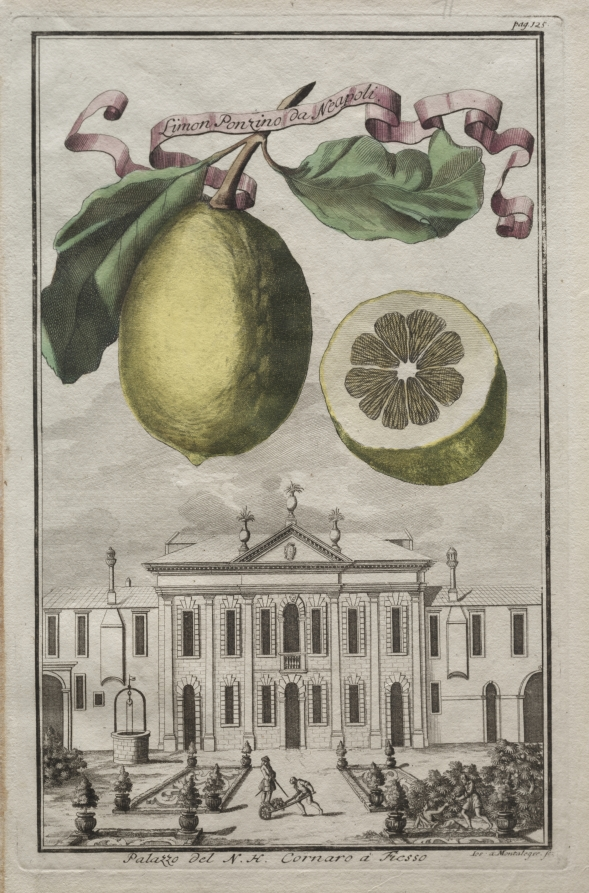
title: Nurnbergische Hesperides: No. 125 - Limon Ponzino da Neapoli. Palazzo del N. H. Cornaro à Fiesso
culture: Hungary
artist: Joseph de Montalegre (Hungarian)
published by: Johoann Christoph Volckamer (German)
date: c. 1708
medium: engraving, hand-colored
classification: Print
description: The title of this set refers to Hercules, a mythological figure who must complete a series of difficult tasks. One of these was procuring the golden apples of the Hesperides, the nymphs who guarded this precious fruit. Hesperides also refers to books on citrus fruit, as it was once thought that the golden apples were actually Spanish oranges.